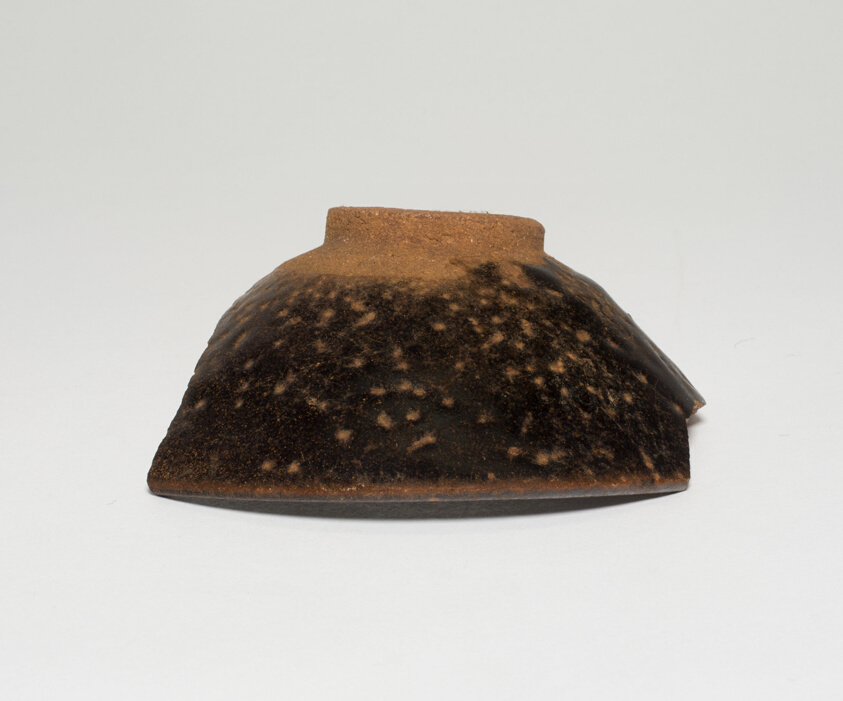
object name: Vessel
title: Fragmentary Bowl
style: Chinese (culture or style)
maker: China, Fujian Province, Jian ware kiln site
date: Song dynasty (960–1279), 12th/13th century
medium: Jian ware; misfired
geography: China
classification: bowl; stoneware; dish (vessel); asian art; ceramics; vessel